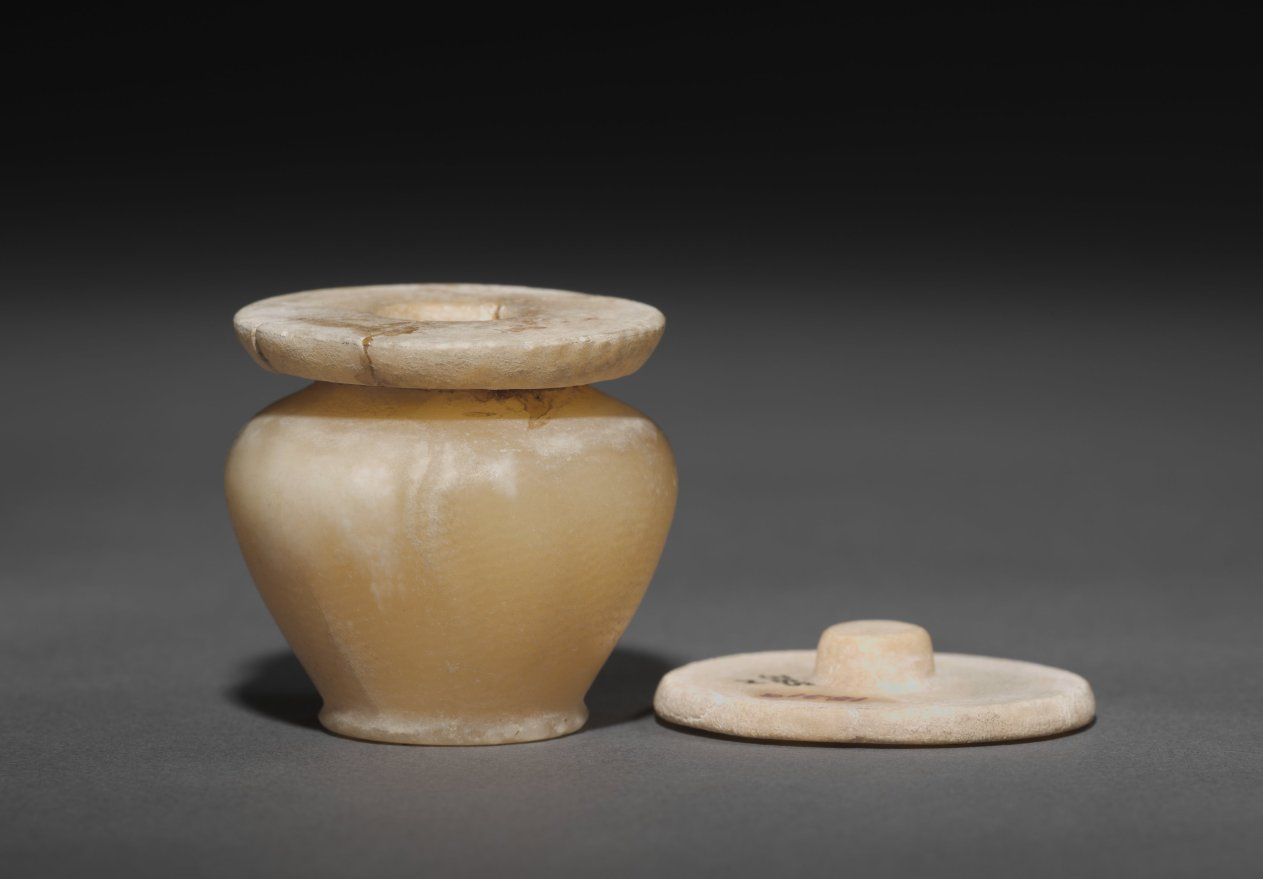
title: Kohl Jar with Lid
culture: Egypt, Middle Kingdom (2040–1648 BCE), Dynasty 12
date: 1980–1801 BCE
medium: travertine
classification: Vessels